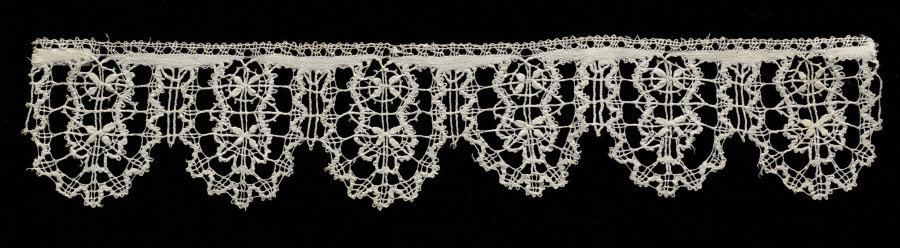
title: Lace Edging of Points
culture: Italy, Genoa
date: 1600s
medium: Bobbin lace (rose lace)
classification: Lace